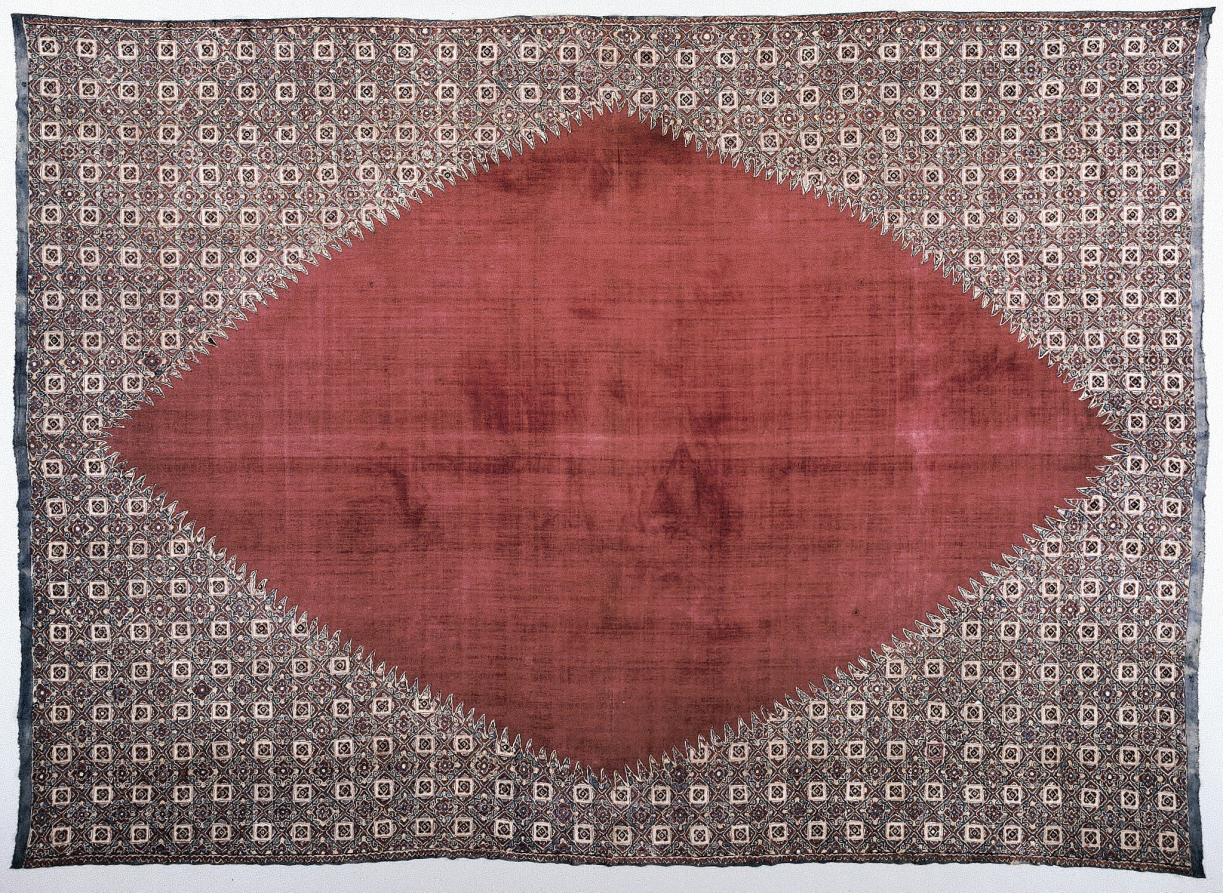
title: Dodot Lampong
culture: India, Coromandel Coast, 18th century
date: c. 1700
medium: cotton; plain weave; drawn resist, painted mordants, dyed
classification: Textile